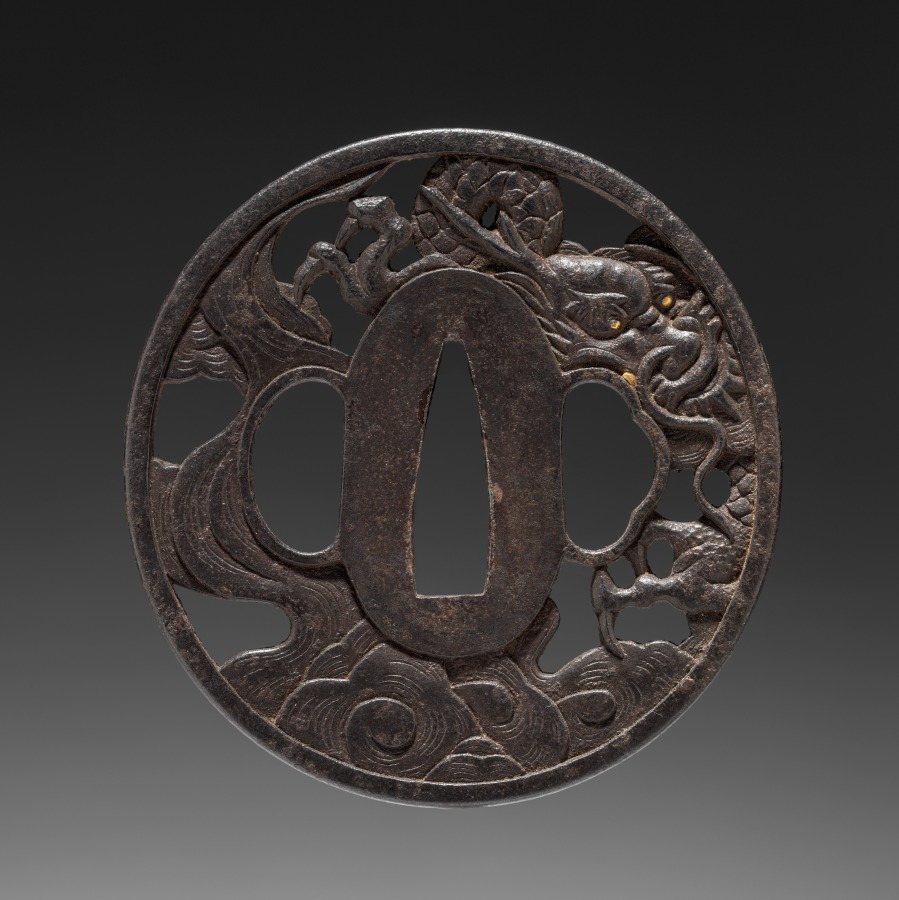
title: Sword Guard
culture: Japan, Edo period (1615–1868)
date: mid-1800s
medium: iron (Shoami type)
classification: Arms and Armor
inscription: signed "Haruta Tsunemoto, residing in Izumo province."